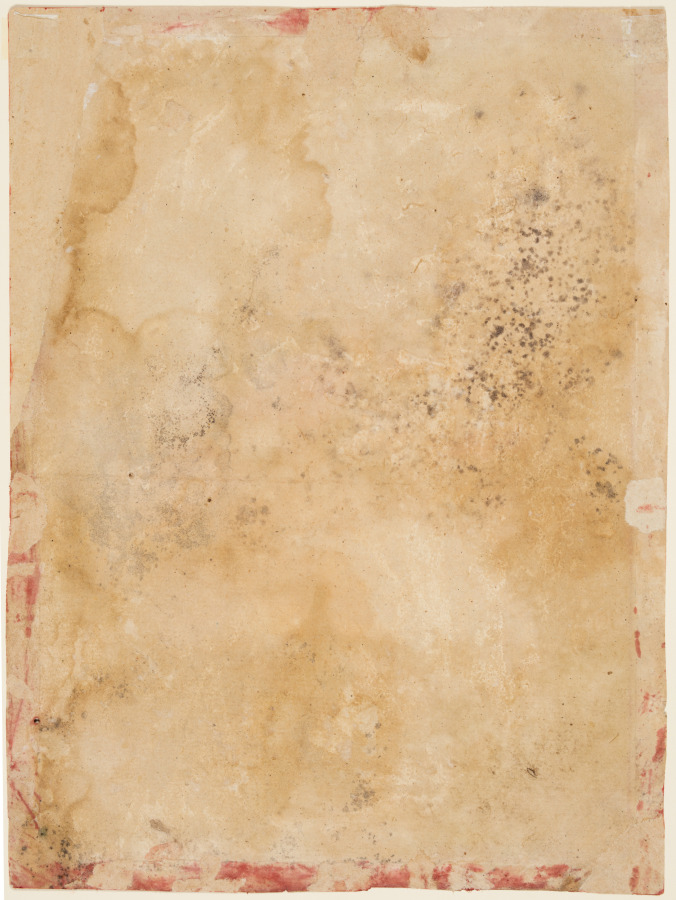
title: Still Life: Bouquet of Flowers Emerging from the Grass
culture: Northwestern India, Rajasthan, Rajput Kingdom of Bundi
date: c. 1750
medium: gum tempera on paper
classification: Painting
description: Studies of flower arrangements in the European manner became a popular subject in Indian miniature painting during the reign of Mughal emperor Jahangir (reigned 1605–27). Inspired by imported prints, Indian artists rendered them in Mughal fashion. Here, in a painting made at a Rajasthani court, the entire bouquet grows magically out of the ground from a single stem.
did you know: The central flower is a scarlet-colored poppy, famed for yielding opium.